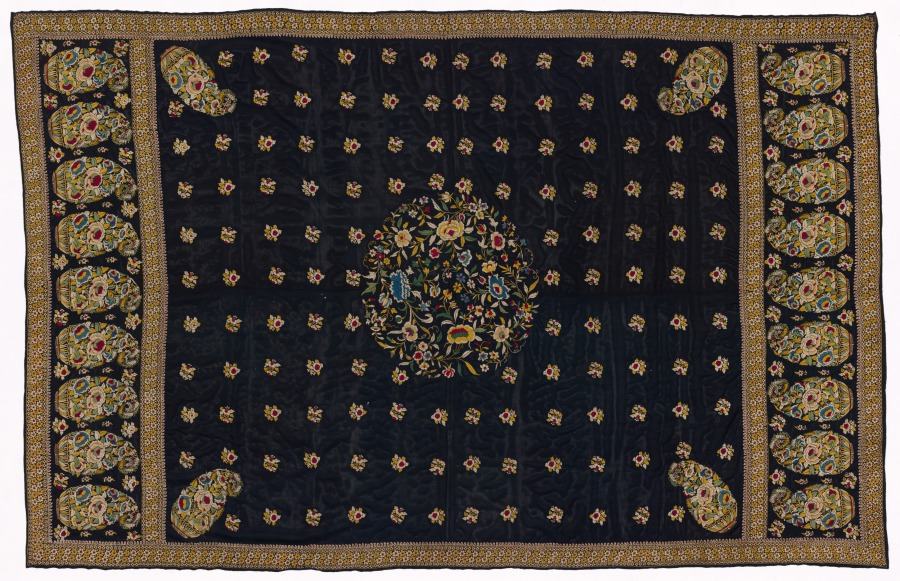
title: Shawl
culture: China, 19th century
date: 1800s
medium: embroidery, silk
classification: Embroidery